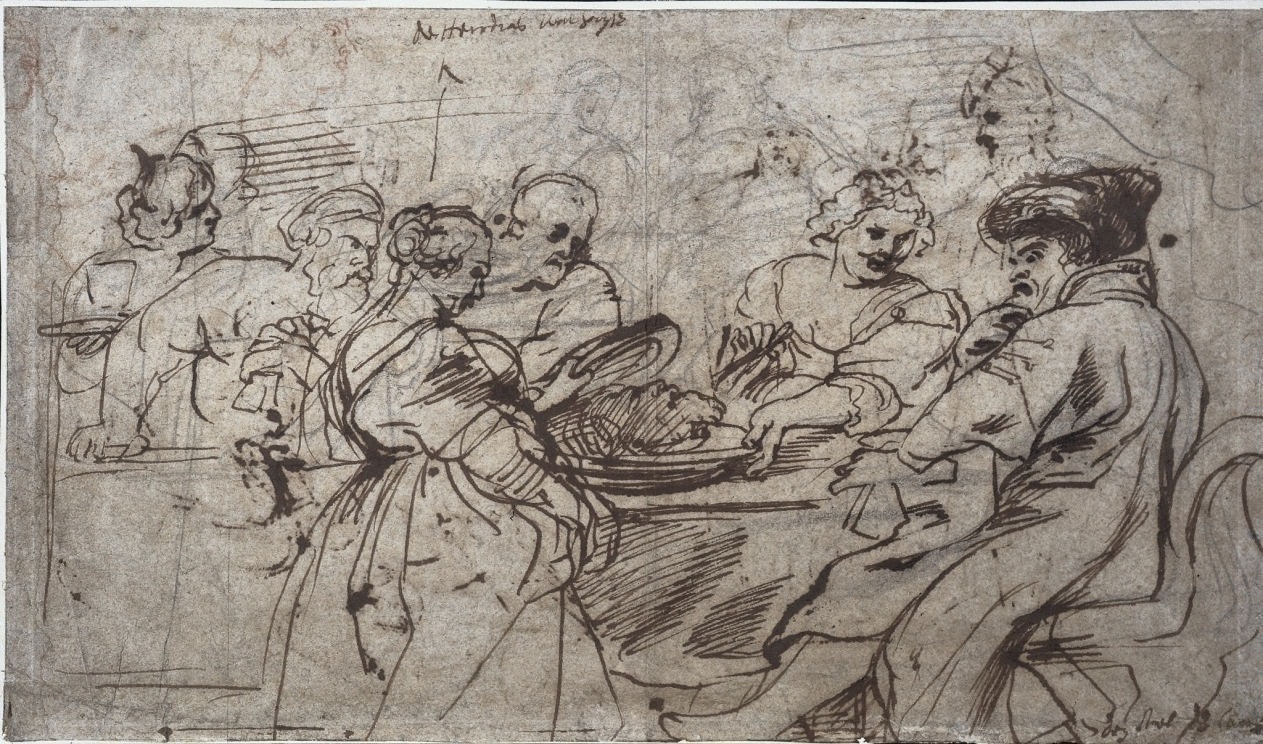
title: The Feast of Herod (recto)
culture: Flanders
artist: Peter Paul Rubens (Flemish, 1577–1640)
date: c. 1637–38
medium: pen and brown ink, with black and red chalk, touched with white gouache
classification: Drawing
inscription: by artist, upper center, in brown ink: de Herodias [wat hooger? (or: "meden hoofte," "wat hoegte," or "wat hogher")]; by artist, lower right, in brown ink: den[or: deze] stoel te [cort?].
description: Peter Paul Rubens had a large studio in Antwerp and used drawing to prepare for large paintings as well as to direct the many pupils who assisted him. Striking in its immediacy, the drawing on the recto of this sheet of paper is a preparatory study for the Feast of Herod painting now at the Scottish National Gallery in Edinburgh. Herod, wearing a large cap and wrapped in a mantle, shrinks back in horror as Salome uncovers a charger that holds the head of Saint John the Baptist. Smiling, Herodias grabs the platter with her left hand and, in a chilling detail, gestures toward the charger with a fork. Rubens wrote what is usually interpreted as “Herodias somewhat higher” at the top of the sheet. The verso of the sheet depicts a sketch for another story featuring a change of fortune at the hands of a vengeful woman, Tomyris with the Head of Cyrus. Rubens made two paintings of the subject (now in Paris and Boston). A rare theme, the story tells of Queen Tomyris who, avenging the death of her son in battle, collects the head of his murderer Cyrus in a bag of human blood. Tomyris is shown seated under a canopy holding a scepter, while the servants before her handle Cyrus’s head. Rubens wrote “plus spatij” (more space) in the center of the sheet.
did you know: The two stories that Rubens depicted on the front and back of this sheet of paper each feature a gruesome death, the result of revenge at the hands of a powerful woman.